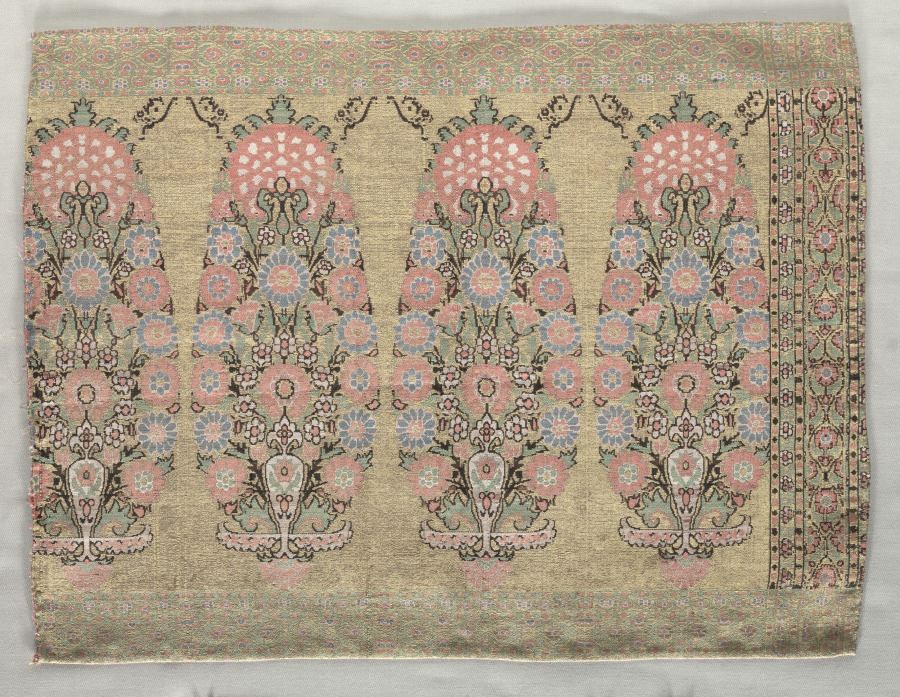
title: Two Pieces from a Scarf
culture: Iran, 18th century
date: 1700s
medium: brocade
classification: Textile